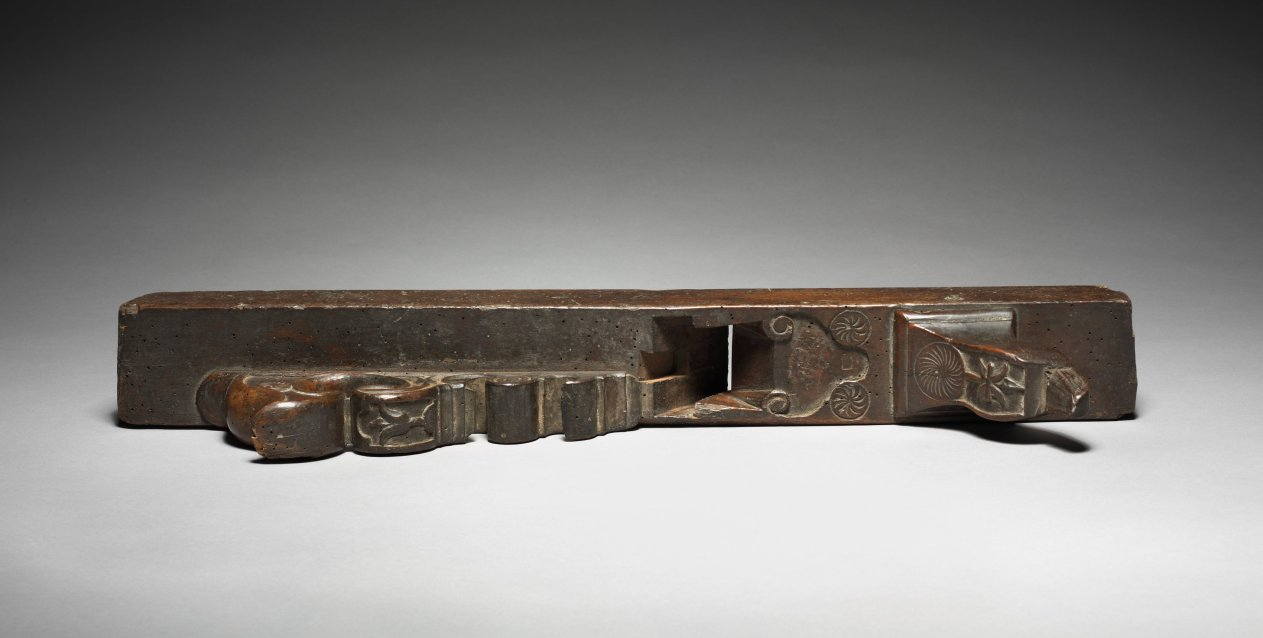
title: Carpenter's Plane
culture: Italy, early 17th century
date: early 1600s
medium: wood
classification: Tool